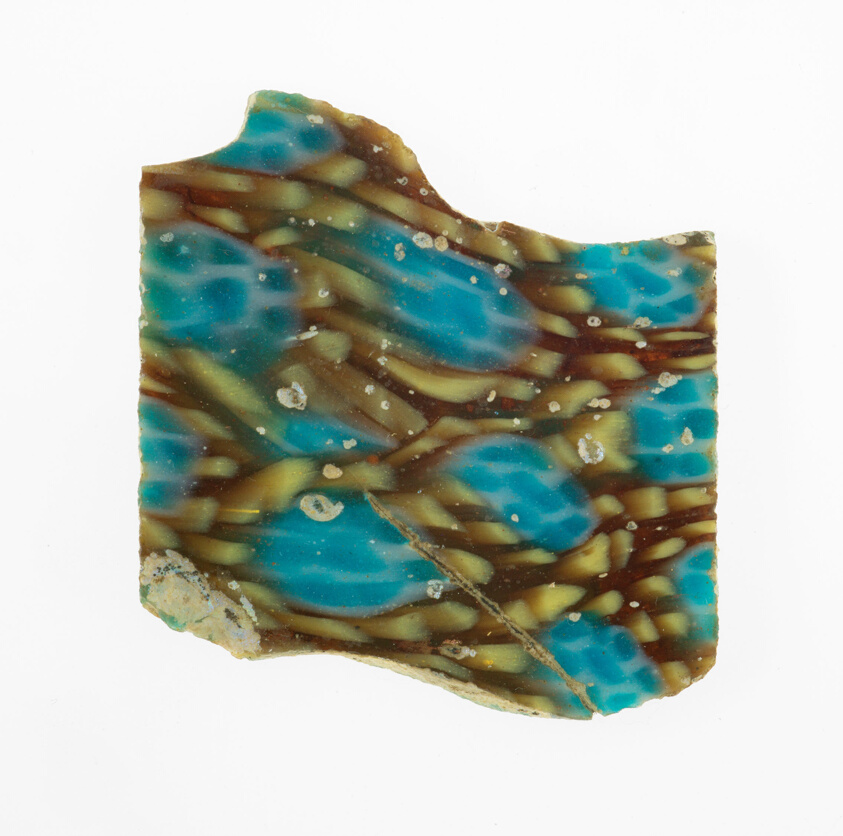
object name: Decorative Arts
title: Fragment of a Wall Revetment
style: roman (ancient, style or period), ancient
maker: Roman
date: 1st century BCE–1st century CE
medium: Glass, mosaic glass technique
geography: Roman Empire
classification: fragment; decorative arts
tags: decoration